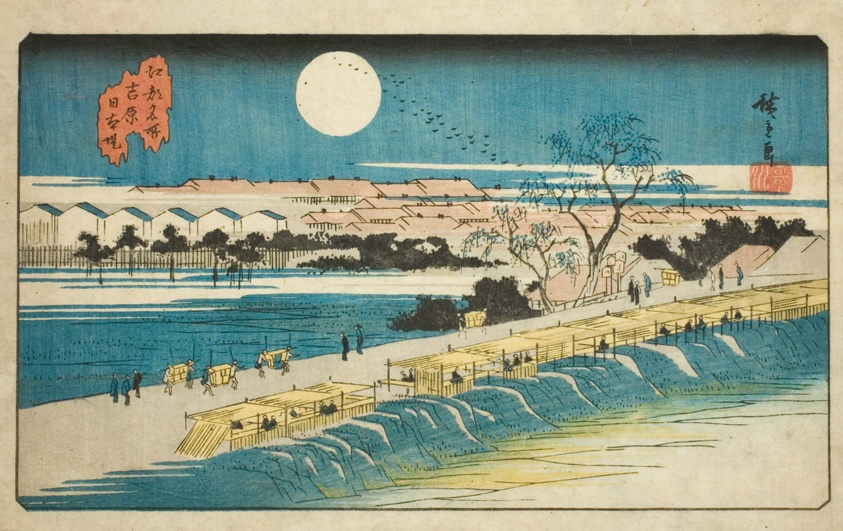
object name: Print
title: Nihon Embankment near the Yoshiwara (Yoshiwara Nihon-zutsumi), from the series "Famous Places in Edo (Koto meisho)"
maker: Utagawa Hiroshige 歌川 広重; Japanese, 1797-1858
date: c. 1835/38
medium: Color woodblock print; aiban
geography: Japan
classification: woodblock print; print; asian art